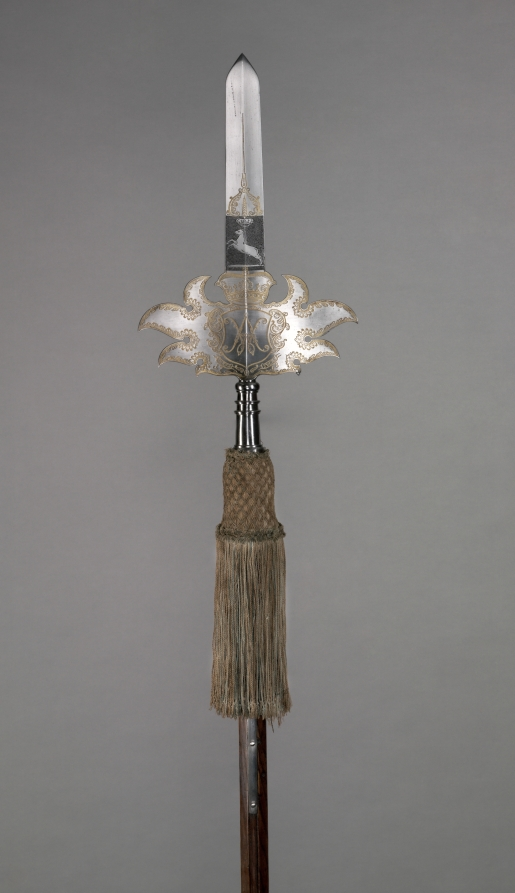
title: Parade Partisan (from the Bodyguard of August Wilhelm, Duke of Brunswick- Wolfenbüttel [1662-1731])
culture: Germany, 18th century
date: 1718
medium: blued, etched and gilded steel, wooden haft with orginal steel base spike, silk tassel with alternating blue and gold bands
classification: Arms and Armor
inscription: AUGUST WILHELM/DG DUX BRUNS EA LUNEB; 1718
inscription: HAW II; PARTA TVERI; 1718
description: The halberd and partisan are hafted weapons highly favored by European infantries of the 1500s and 1600s for their great versatility and deadly effect. From about 1550 on, these weapons underwent significant changes as they gradually became more ornamental. The large flat surfaces of the blades lent themselves to engraving, etching, gilding, and other forms of decoration. They also provided the perfect location for the coats of arms of princely or noble families. For this reason, hafted weapons became the favored parade weapons of palace guards and splendidly outfitted special regiments of princely bodyguards. These examples, made for the German dukes of Brunswick at Schloss Blankenburg, still have their silk tassels in their original colors of blue and yellow.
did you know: Partisans were popular weapons before firearms.